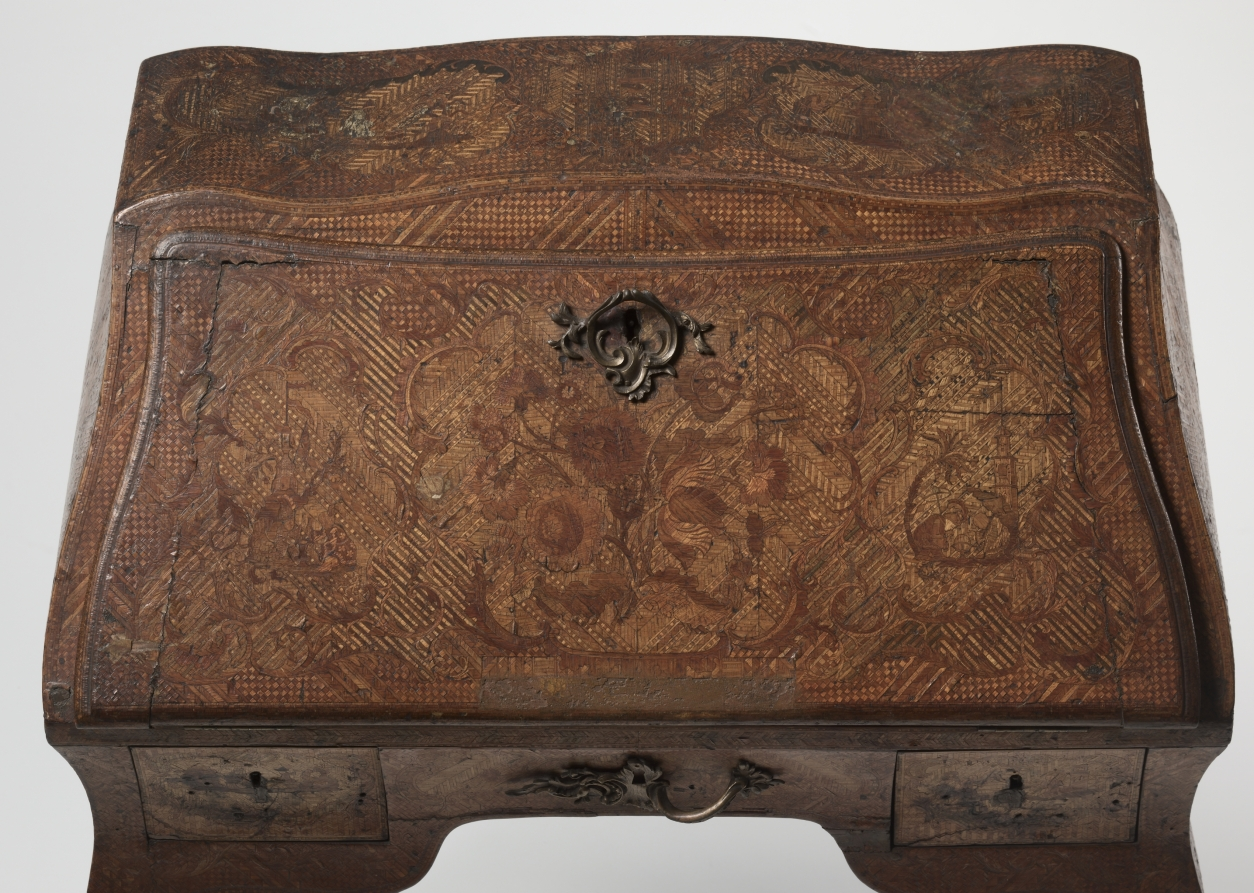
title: Ladies Writing Desk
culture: Possibly Northern Italy, near France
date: c. 1750–75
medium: Oak with straw marquetry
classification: Furniture and woodwork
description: As early as the beginning of the 17th century, straw marquetry was being produced throughout Europe. Along with cabinetmakers and specialized artisans, creators of straw marquetry included home artisans, nuns, monks, and noble dilettantes. Thus the quality and design of objects using straw marquetry is quite diverse. While some pieces appear nearly naive, others are made very masterfully, such as with this ladies writing desk. Some of these objects were even presented in royal cabinets of wonder. Because of its silky gloss and bright colors, straw marquetry was held in great esteem as unusual and remarkable decoration for furniture and other objects on par with gemstones, tortoiseshell, or ivory.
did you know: The surface of this ladies writing desk is completely covered with straw marquetry decoration both outside and in.